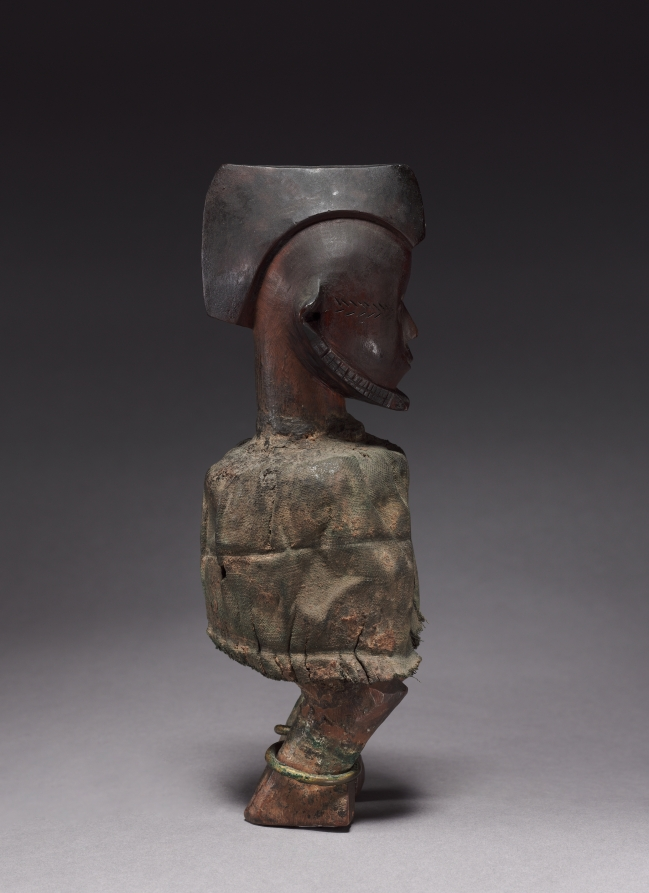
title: Male Figure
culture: Africa, Central Africa, Republic of the Congo or Democratic Republic of the Congo, Teke-style maker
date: late 1800s-early 1900s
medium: Wood, cloth, organic material, and copper alloy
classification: Sculpture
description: This figure was the Delennes' first African art acquisition. They purchased the work in Paris in 1958—the year they were married—from the then leading French dealer Henri Kamer. The couple's interest in African art, which also inspired this particular acquisition, was triggered by their visit to the Congolese pavilion at the Brussels world's fair that same year. This experience made a lasting impression and triggered a lifelong appreciation for the art of what was then still the Belgian Congo. Although Odette later admitted that she knew that this figure was not the best example of Teke art, she and her husband held on to it because it served as a personal souvenir of their meeting each other.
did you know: This figure was the Delennes' first African art acquisition; it symbolized Rene and Odette’s first meeting.